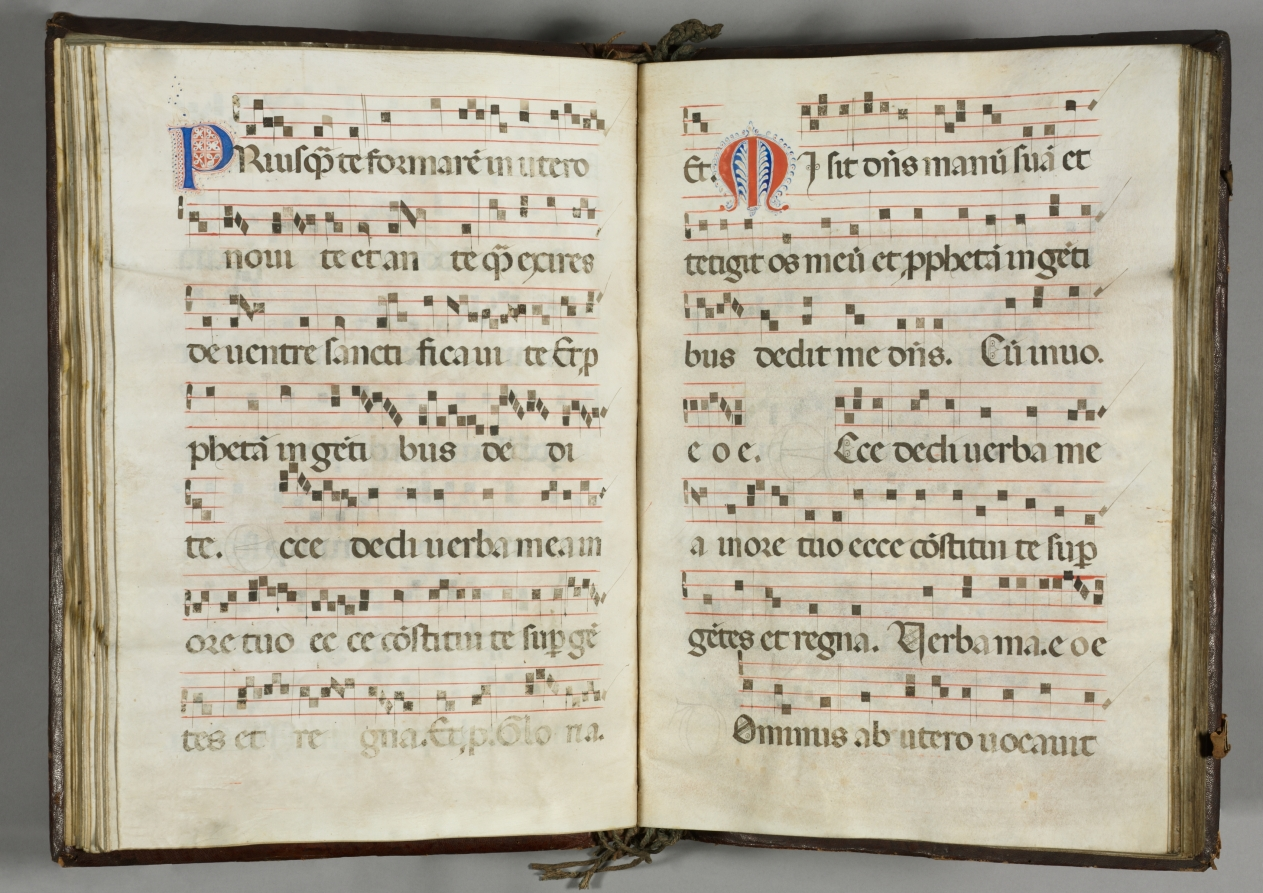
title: Choir Book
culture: Italy, 16th century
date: 1500s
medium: leather binding, copper alloy buckles, lead seal, parchment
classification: Manuscript